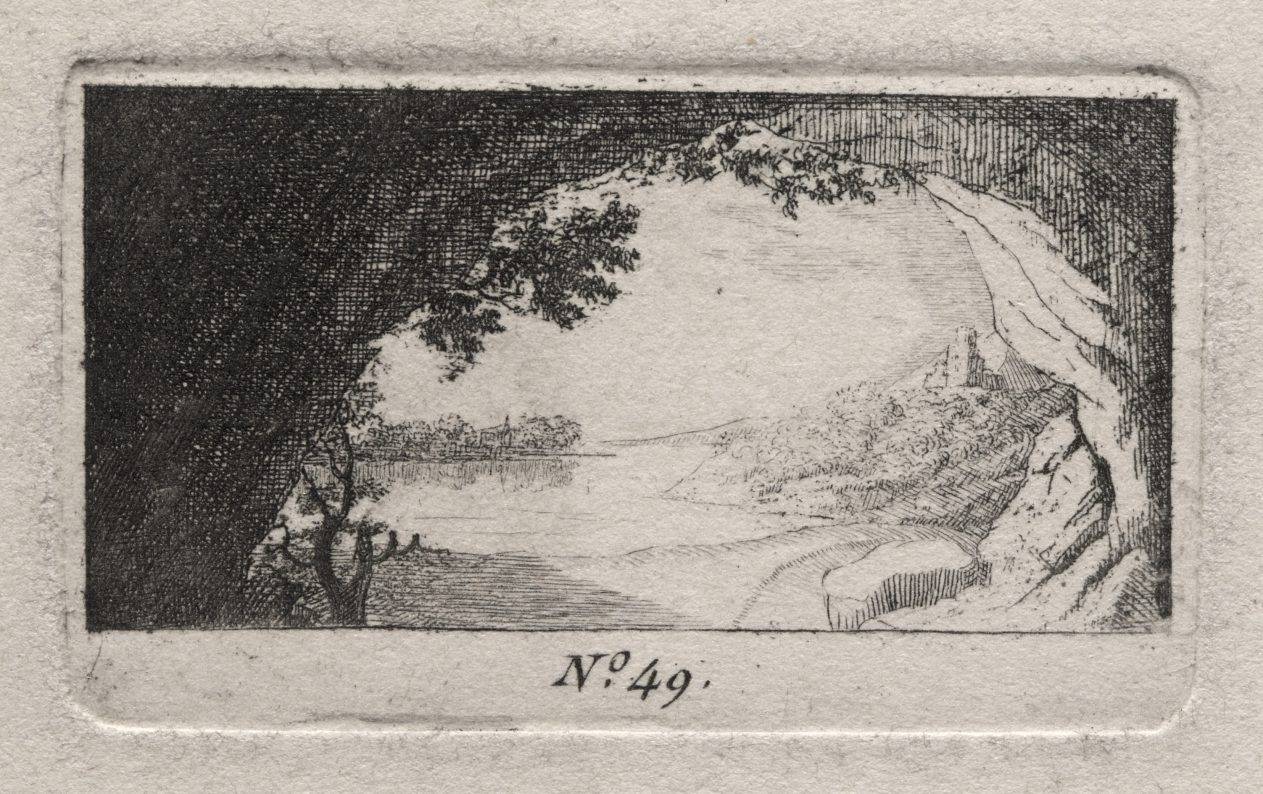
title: Landscape with Arched Rocks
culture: France, 18th century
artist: Antoine de Marcenay de Ghuy (French, 1724–1811)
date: 1778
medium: etching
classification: Print